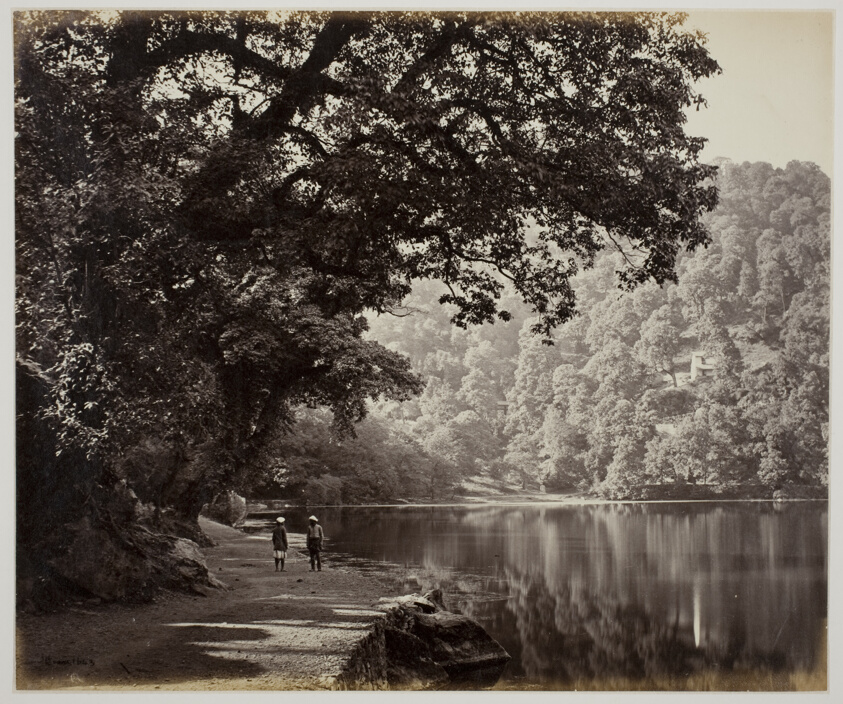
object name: Photograph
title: Untitled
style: 19th century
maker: Samuel Bourne (English, 1834–1912)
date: 1870s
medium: Albumen print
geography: England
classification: albumen silver print; photographic process; photography; photograph